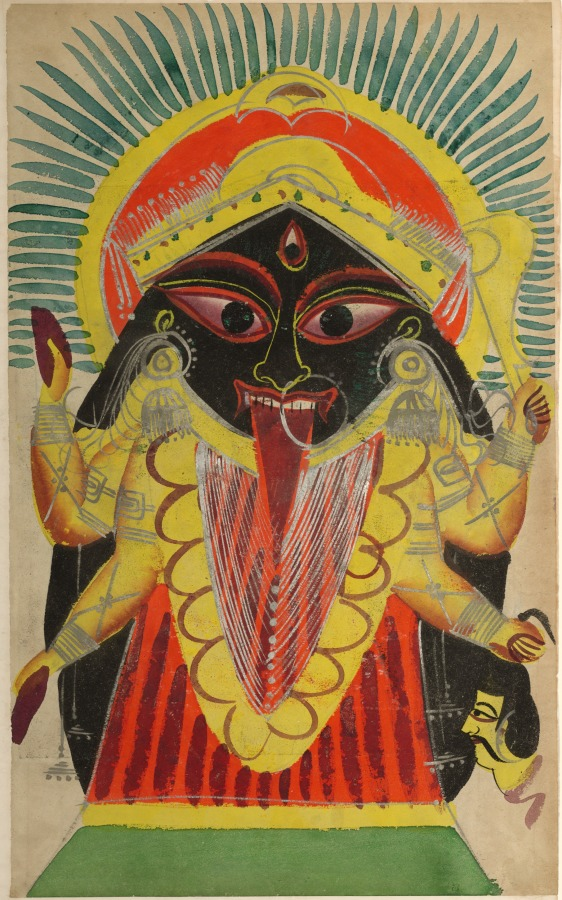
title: The Goddess Kali (recto), from a Kalighat album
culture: Eastern India, Bengal, Kolkata, Kalighat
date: c. 1890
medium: Gum tempera, graphite, ink, and tin on paper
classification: Painting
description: Black-skinned, four-armed, her tongue out, and blood dripping from her mouth, Kali has a third eye—representative of enlightened or divine knowledge—on her forehead. Simultaneously benevolent and dangerous, she holds a sword and a demon’s severed head in two hands while the other two hands are in gestures of protection and blessing. This image would have been sold as a pilgrim souvenir to both locals and the colonial British around the Kalighat temple and is a replica of the image worshipped inside the temple. The frightening image of Kali especially fit into the colonial imagination and into Victorian popular culture and would have been an iconic souvenir/artifact to be shown to intrigued and horrified friends at home in England.